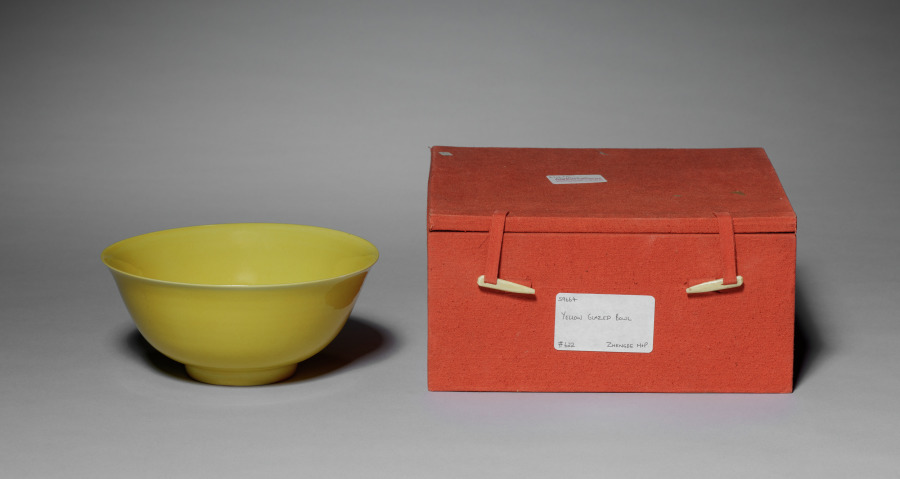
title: Yellow-Glazed Bowl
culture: China, Jiangxi province, Jingdezhen kilns, Ming dynasty (1368–1644), Zhengde mark and reign (1505–21)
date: 1505–21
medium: Porcelain with monochrome yellow glaze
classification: Ceramic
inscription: 大明正德年製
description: Monochrome yellow–glazed porcelain appears first during the Ming dynasty and is the combined result of technological advancement, the requirements of state rituals, and aspirations of taste. The base bears a mark of the Zhengde (正德) reign period, renowned for its high-quality imperial porcelain, and a pleasure-seeking emperor who died in his youth. Imperial marks were permitted to be applied only by Jingdezhen workshops affiliated with the court. Most scholars believe that yellow monochrome ware was reserved for the use of the imperial household or served as diplomatic gifts. The color is therefore often called “imperial yellow.”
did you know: Zhengde–marked bowls of this so-called imperial yellow type are also preserved in the National Palace Museum in Taipei and the Topkapi Saray, Istanbul, once the palace of the Ottoman sultans.